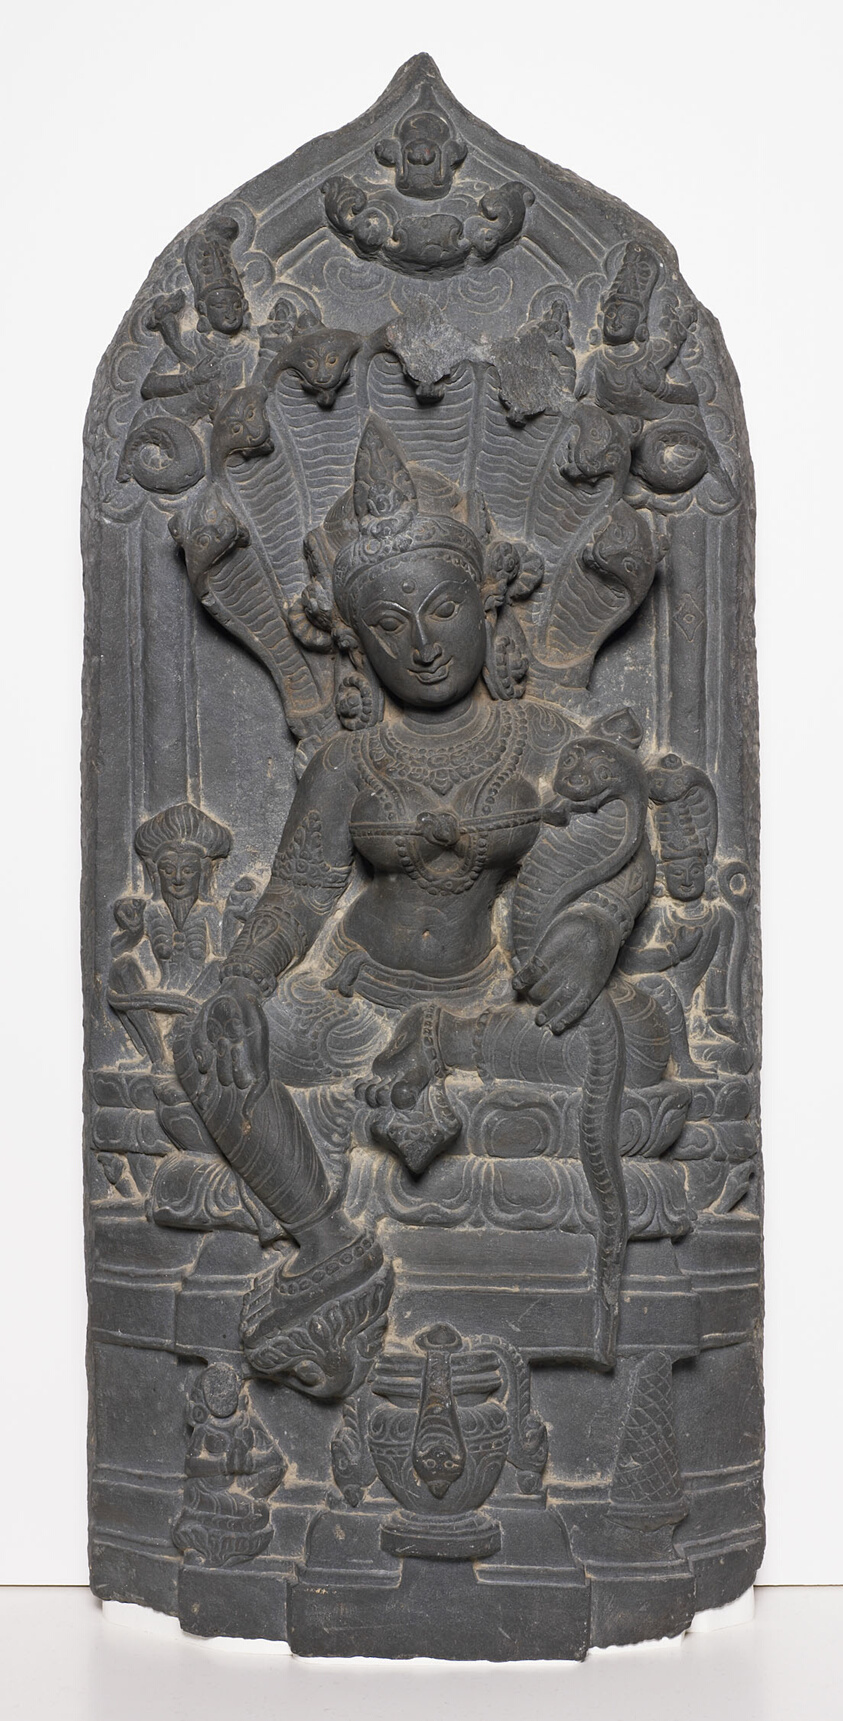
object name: Sculpture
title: Snake Goddess Manasa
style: South Asian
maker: Bangladesh or India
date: Pala period, c. 11th century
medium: Basalt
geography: Bangladesh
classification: stone; sculpture; asian art